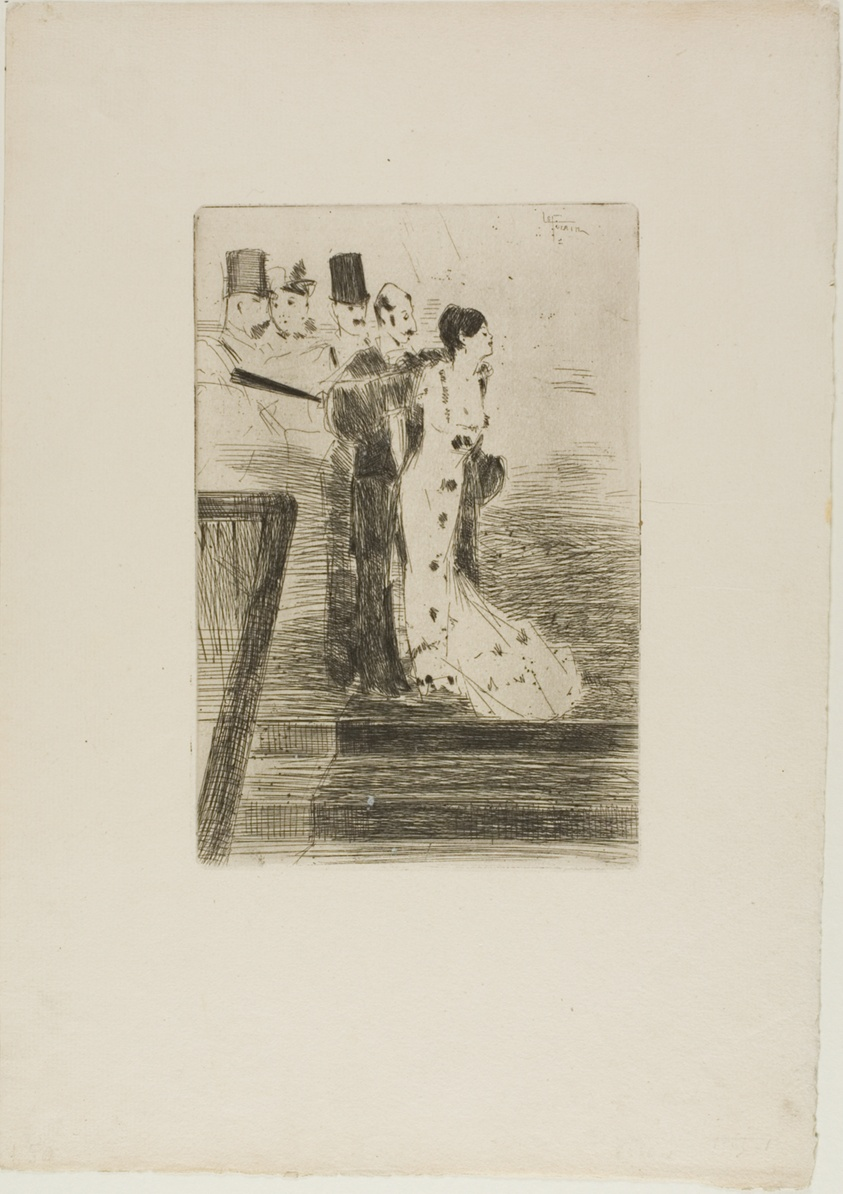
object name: Print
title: The Departure of the star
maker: Jean Louis Forain (French, 1852-1931)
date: November 1876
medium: Etching on cream laid paper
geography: France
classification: etching; print; prints and drawing